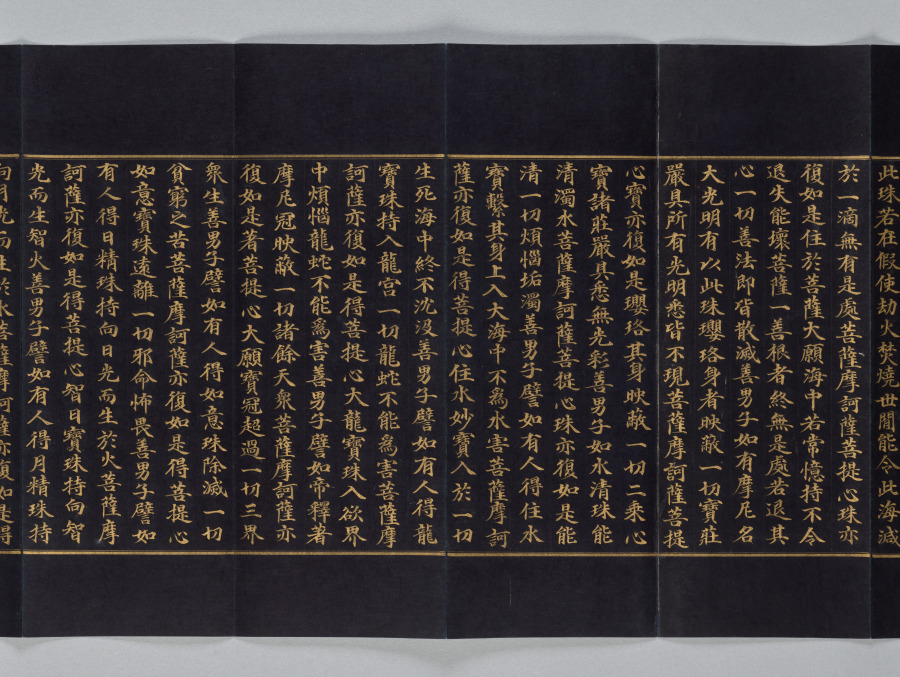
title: Avatamsaka Sutra No. 78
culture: Korea, Goryeo dynasty (918–1392)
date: 1300s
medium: Folded book with illustrated frontispiece; gold and silver on mulberry paper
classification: Bound Volume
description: This illuminated manuscript presents one part of the multivolume sacred text titled Avatamsaka (Flower Garland) sutra. Both the script and the image are rendered in gold ink on the smooth surface of the dark blue, indigo-dyed mulberry paper. This portion of the text, which reads from right to left, describes the encounter of the Buddha of the Future (Maitreya) and the young pilgrim Sudhana. The Buddha gives his words of wisdom to Sudhana, who asks questions about the path toward spiritual awakening. Mixed with ink and glue, the gold has a brilliance that strikingly reflects Sudhana’s ardent quest for understanding the way to reach enlightenment.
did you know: The pristine condition of this manuscript indicates that it was rarely used after its creation, revealing that the act of making a manuscript rather than reading it was the main religious goal.